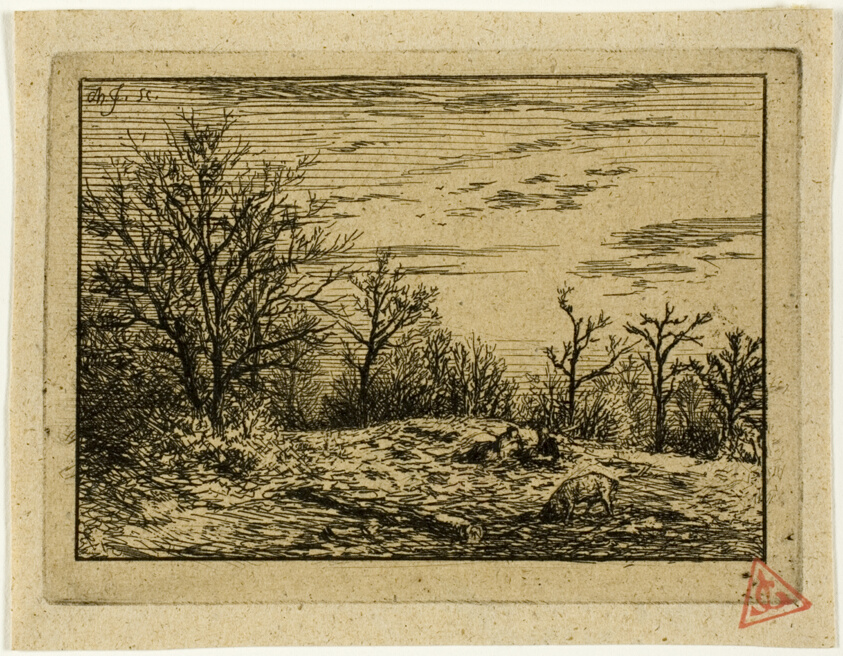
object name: Print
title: Landscape in Winter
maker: Charles Émile Jacque (French, 1813-1894)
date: 1846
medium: Etching on buff chine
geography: France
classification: etching; print; prints and drawing